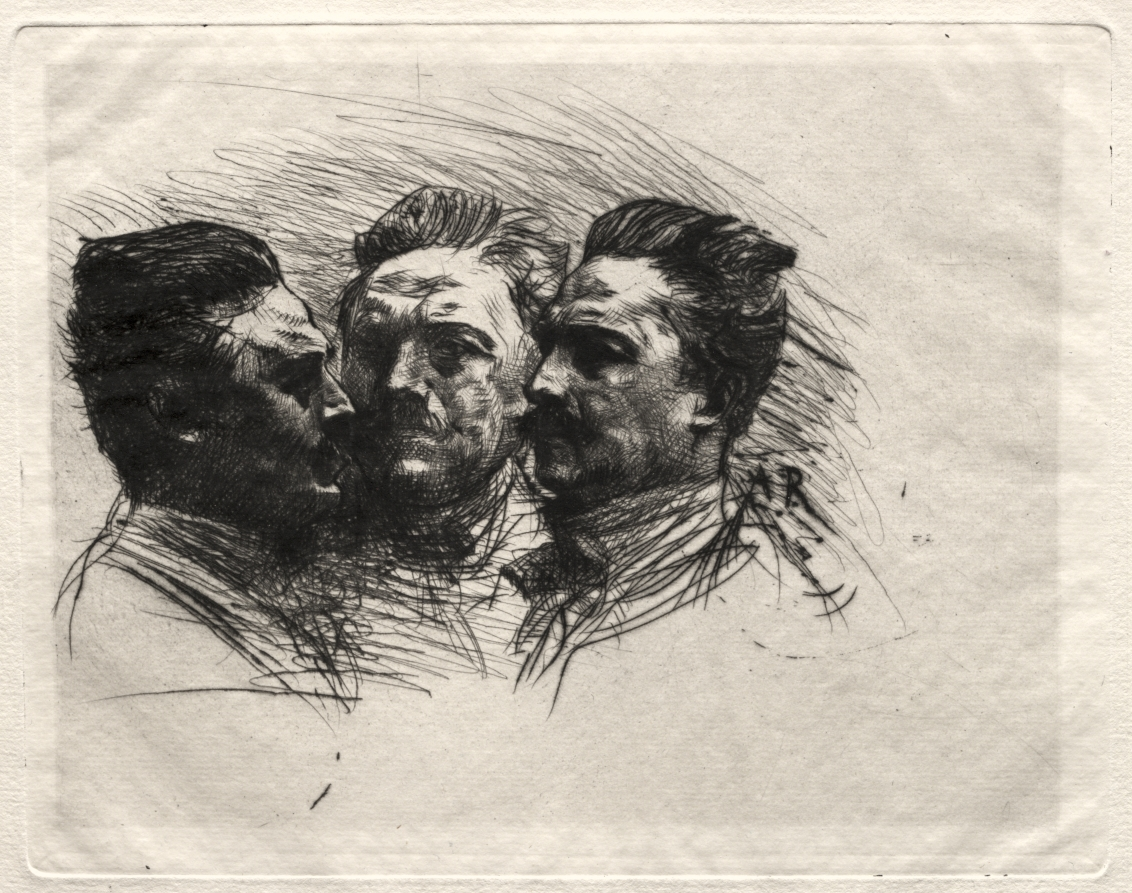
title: Henry Becque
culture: France, late 19th-early 20th Century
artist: Auguste Rodin (French, 1840–1917)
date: 1883–1887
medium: drypoint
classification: Print